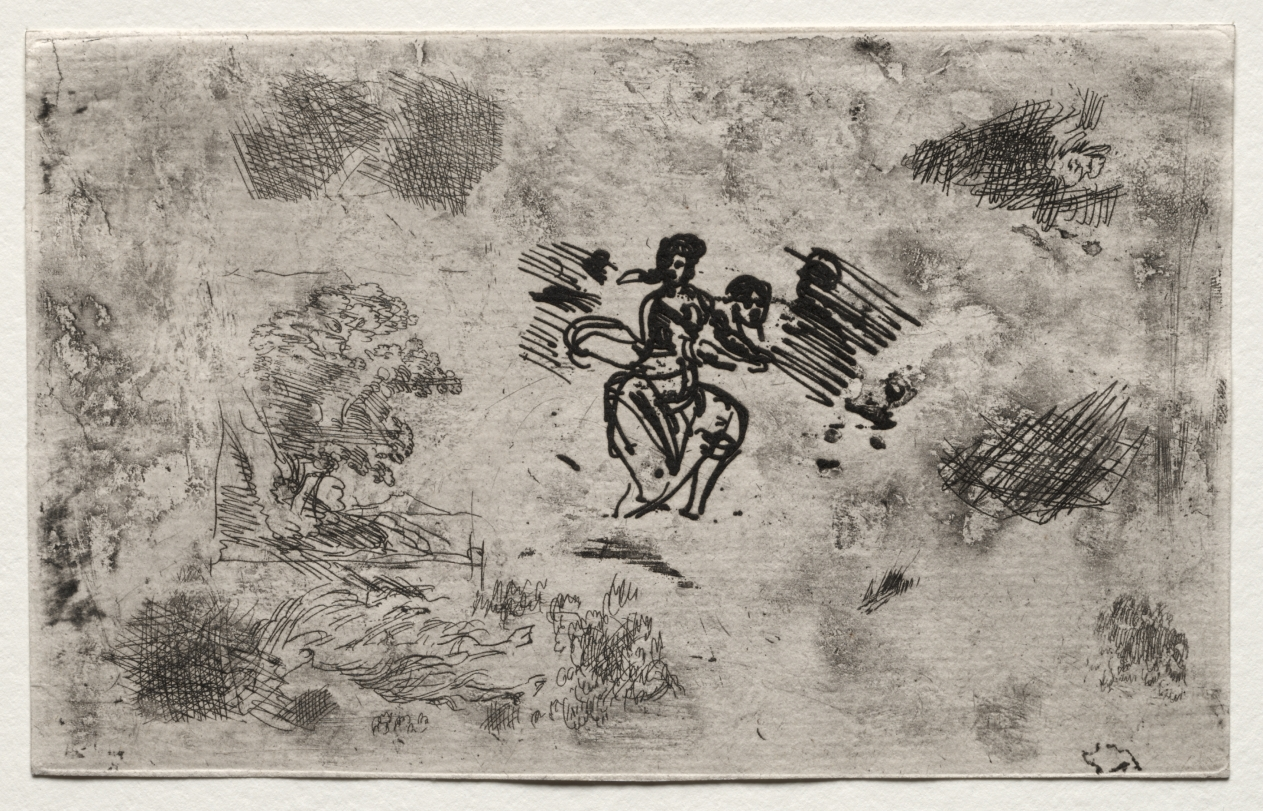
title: Study of a Seated Woman and other Sketches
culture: France, 17th century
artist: Claude Lorrain (French, 1604–1682)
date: c. 1630–33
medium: etching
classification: Print